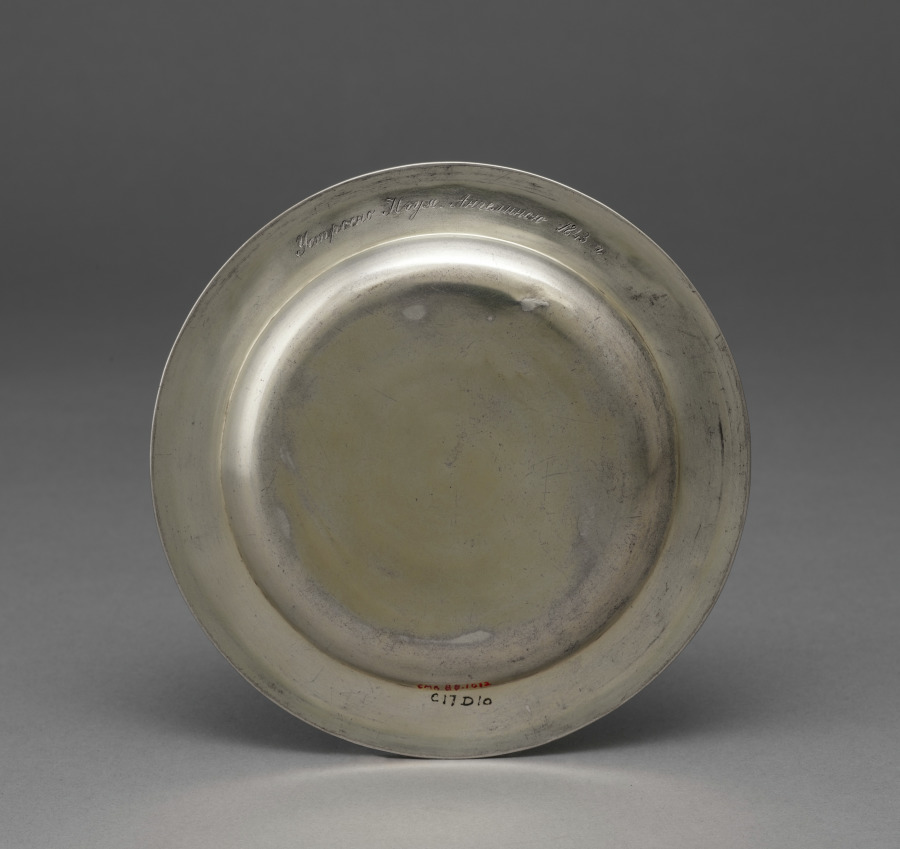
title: Paten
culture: Russia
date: 1800s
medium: engraved silver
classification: Silver